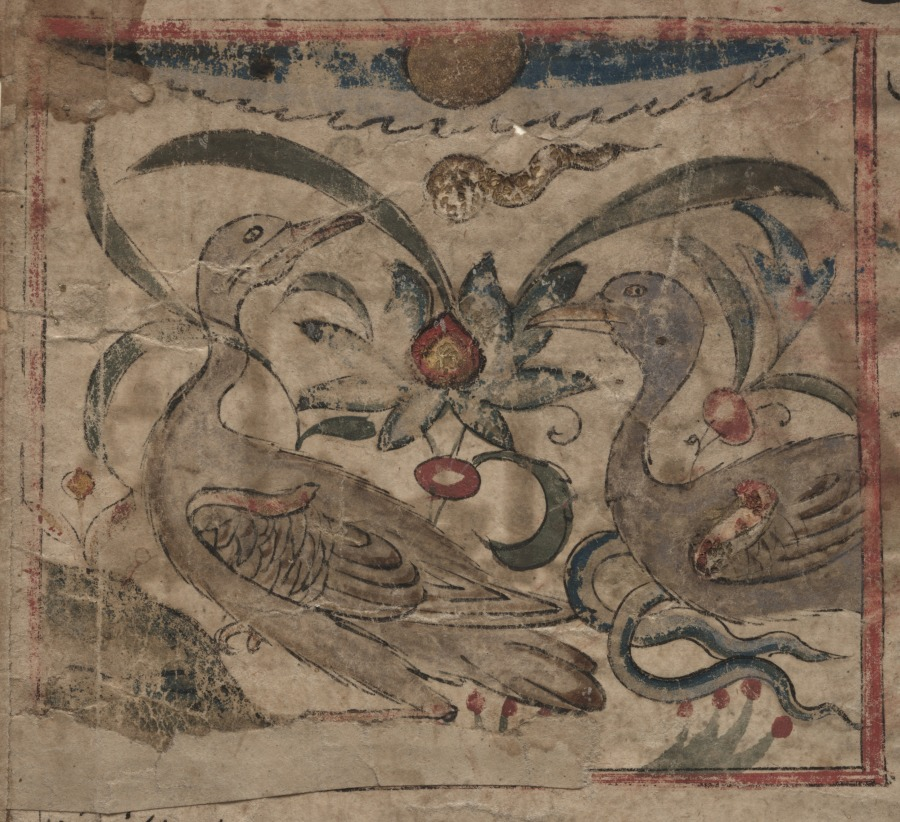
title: "Benefits of the Parts of Vultures" (From the Manafi' al-Haywan of Abu Sai'd Ubayd-Allay Ibn Bakhtishu) (recto)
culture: Iran, Marageh, Mongol Period (Ikhanid), late 13th Century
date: late 1200s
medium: opaque watercolor, ink and gold on paper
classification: Manuscript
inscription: Script: Naskh